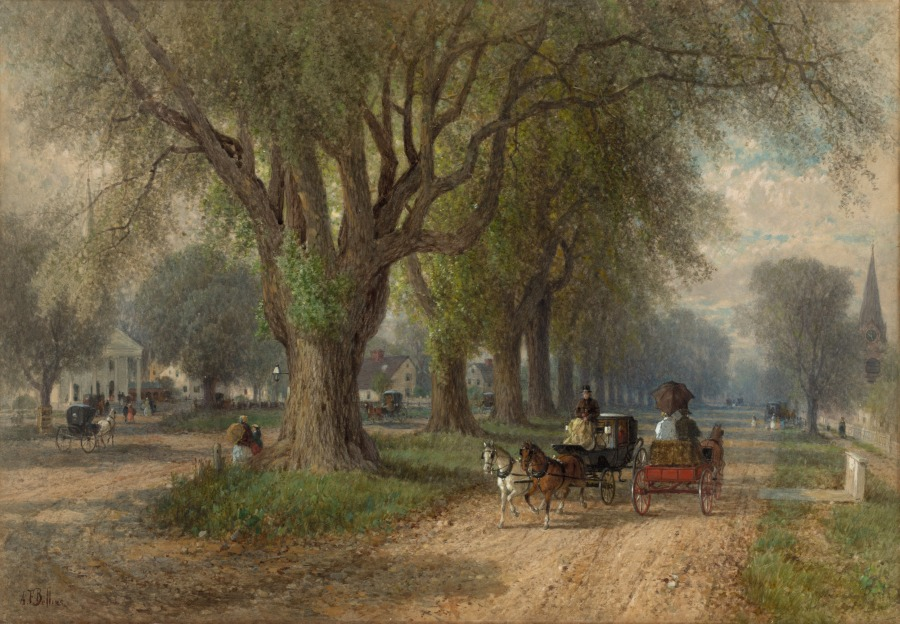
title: Sunday in New England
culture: America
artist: Albert Fitch Bellows (American, 1829–1883)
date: c. 1876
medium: watercolor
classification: Drawing